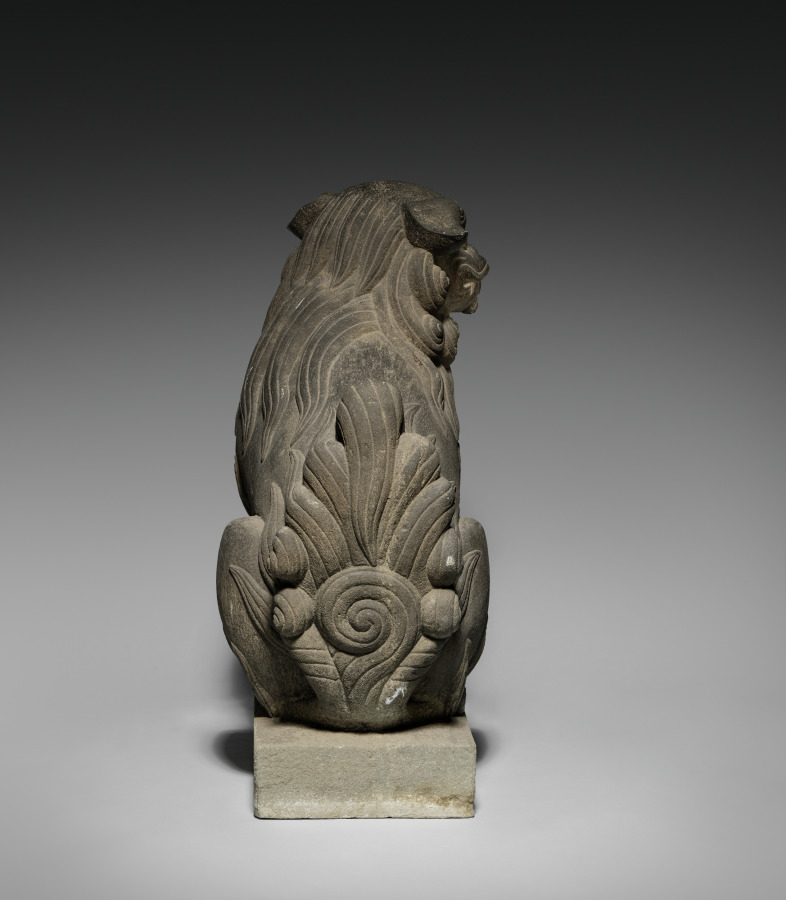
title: Lion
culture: Japan?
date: c. 1800s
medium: gray schist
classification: Sculpture